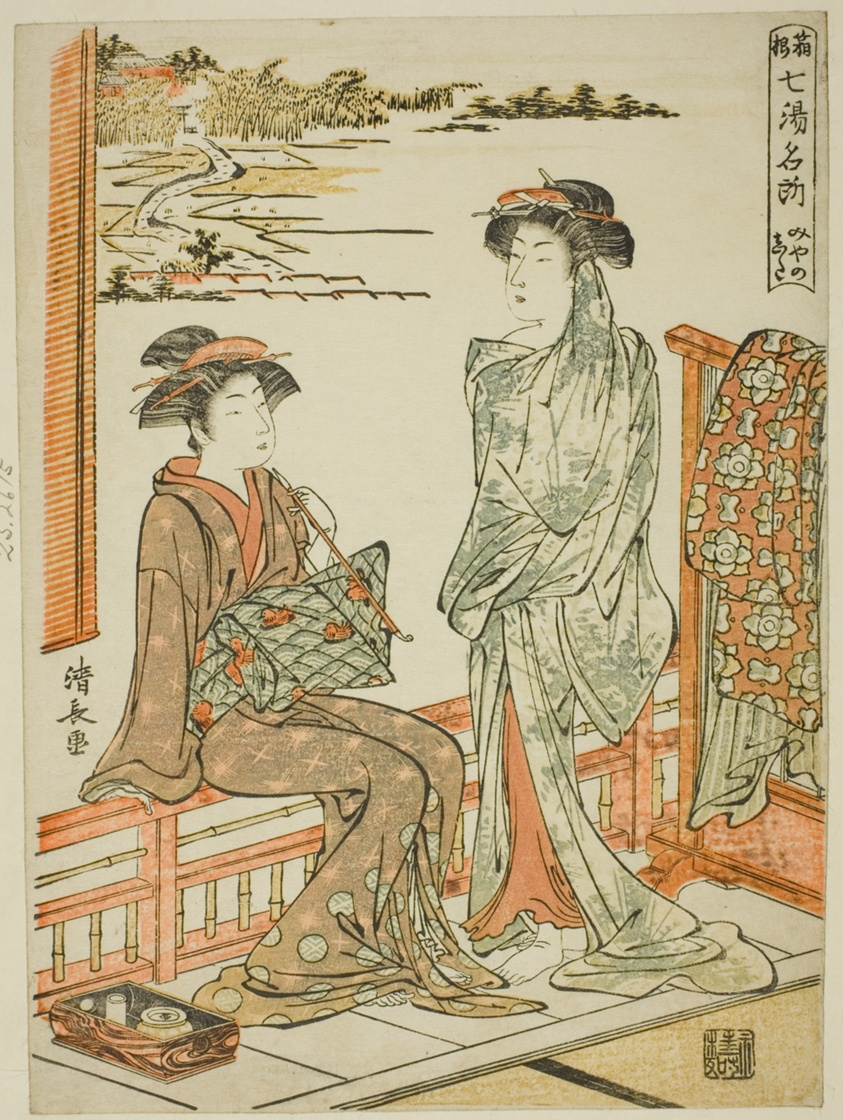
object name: Print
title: Miyanoshita, from the series "Seven Famous Hot Springs of Hakone (Hakone shichito meisho)"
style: Japanese (culture or style)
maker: Torii Kiyonaga (Japanese, 1752-1815)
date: c. 1780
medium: Color woodblock print; chuban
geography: Japan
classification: woodblock print; print; asian art